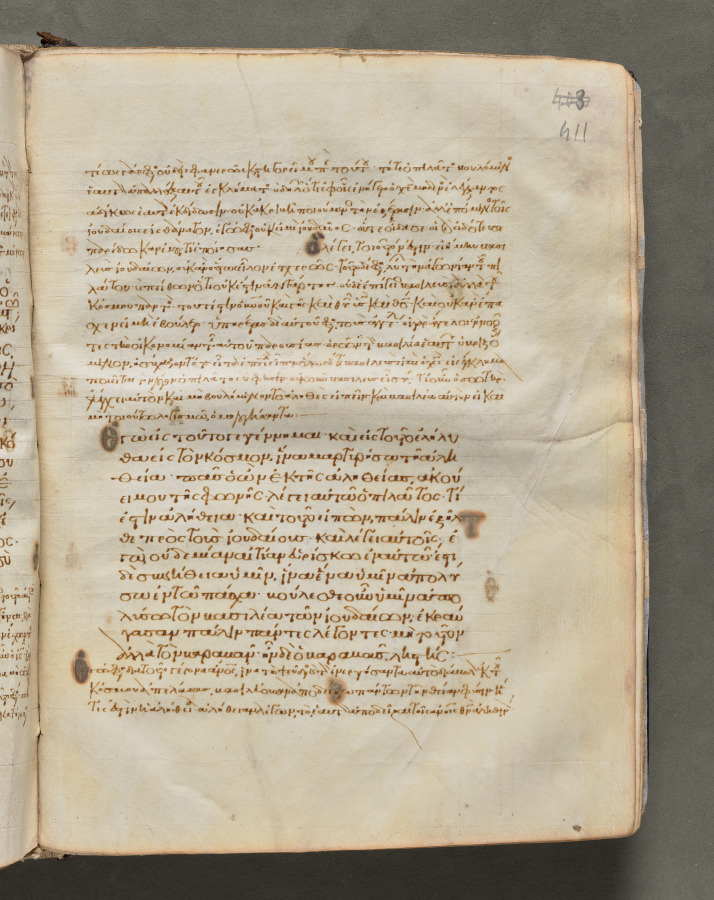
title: Text, folio 411 (recto), from a Gospel Book with Commentaries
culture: Byzantium, Constantinople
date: c. 1000–1100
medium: ink, tempera, and gold on vellum; leather binding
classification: Bound Volume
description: Each of the four gospels in this book opens on a page with brilliantly illuminated borders depicting the author of the text as well as birds—principally peacocks, symbols of the immortality of the soul—and fountains, representing the fountain of life and the salvation of the soul. This volume consists of 428 leaves with texts in Greek. Its level of sophistication suggests that it was probably written and decorated in a monastery in Constantinople.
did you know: Gospel books were carried in procession through Byzantine churches.